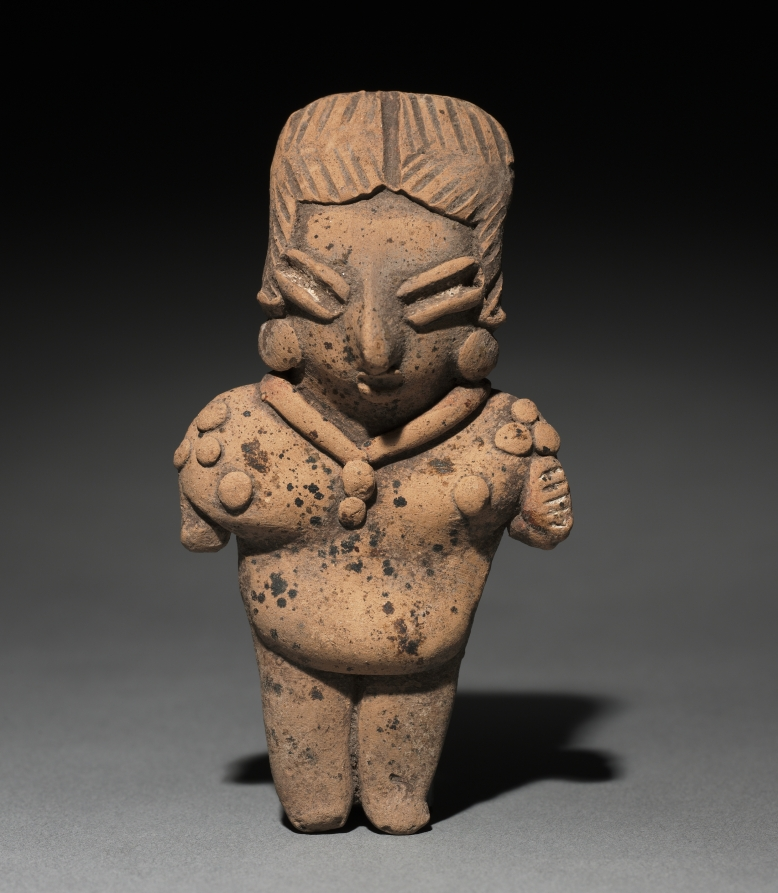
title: Female Figurine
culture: Mesoamerica, Guanajuato or Michoacán, Chupícuaro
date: 400–100 BCE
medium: ceramic, pigment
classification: Sculpture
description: The Chupícuaro culture, located north of Mexico City in the state of Guanajuato, created a distinctive ceramic tradition including small clay figurines. This example is said to belong to a group of ten figurines from the same burial or cache (1990.145–154). The group includes both males and females that can be sorted into couples based on size.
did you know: Groups of figurines were sometimes arranged in scenes and likely used in household rituals.